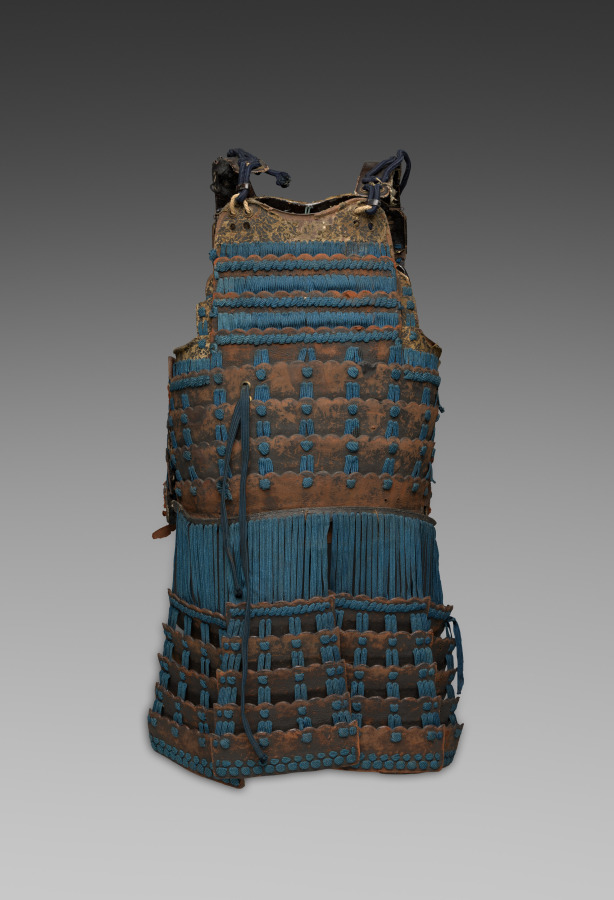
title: Cuirass (Dō)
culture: Japan, Edo period (1615–1868)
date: 1615–1868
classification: Arms and Armor